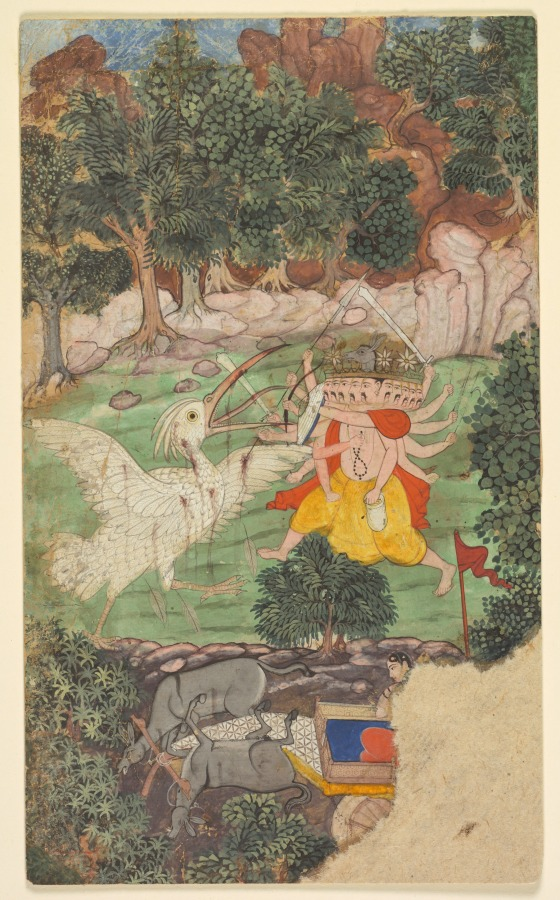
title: Battle of Ravana and Jatayu, from Chapters 50 and 51 of the Aranya Kanda (Book of the Forest) of Valmiki's Ramayana (Rama’s Journey); folio from the "Burnt" Ramayana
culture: Central India, Bundelkhand Region, Madhya Pradesh, Rajput Kingdom of Datia, Court of Raja Bir Singh Deo (reigned 1605–27)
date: c. 1605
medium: Gum tempera and ink on paper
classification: Painting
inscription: [[verso, text of Battle of Ravana and Jatayu: Sanskrit text in devanagari script]]: Now [an extraordinary fight ensued] there between the vulture [Jatayu] and the demon [Ravana], quite violent [as if] between two great, winged mountains. With sharp [arrows, broad-headed and made of iron] and spears too, [that immensely powerful demon] forcefully showered [the King of Vultures]. In the course of battle that vulture, Jatayu, Lord of Birds, [confronted] that mass of arrows [the weapons of Ravana], and then he, [that vulture], like a mountain shaken about [fell backward], and with his talons dragged him [Ravana] down, overcome by anger. And that immensely powerful Lord of Birds instantly made his [Ravana’s] limbs bloodied with his sharply taloned feet. Then, Ravana [in a rage] pierced the King of Vultures in battle with [three direct arrows], frightful and swift. And after, he took up his other dreaded arrows on reserve, [with their arrowheads straight]. Each one resembled Death’s staff, [crushing insolence in] enemies. That immensely powerful, mighty demon pierced the [the bird’s body] with [perfectly sharp], golden-feathered arrows . . . . Without even taking those arrows into account, that enraged bird launched himself at Ravana. [Flying upward and then rushing down], raising his wings overhead, he battered [Ravana] with those feathered limbs. [Then, that Lord of Birds, energy blazing, splintered] with his claws [Ravana’s] bow and arrows, adorned with gems and pearls. And that Lord of Birds [splintered] also those very arrows shot [by Ravana]. Then, that immensely powerful [Indra of Birds] [over and over again, pecked at Ravana’s divine crown] made of gold and glittering with every jewel, and [being full of rage, hurled] it through the sky. Like the sun’s halo, it glistened as it sank. [That bird] struck down the asses, with their golden chest armor and devilish [pishacha] faces, and yanking them about, [instantly deprived them of breath]. He [smashed] the fearsomely huge chariot, which flies upon a wish, ornamented from wheel to pole, [each part arrayed in gold] and jewels. Tearing the charioteer from the chariot, [that Lord of Birds], with talons [that seemed like elephant goads, quickly shred him], then tossed him away. Ravana, his bow broken, chariot done with, [his asses killed, his charioteer slain,] fell to the ground, holding Vaidehi [in the crook of his arm]. Seeing Ravana fallen to the ground, his chariot smashed, all the other creatures celebrated the King of Vultures, crying—“Well done, well done!” [And the gods and sages] were amazed when they saw [Ravana, the destroyer of pride among enemy armies,] who was never defeated [by the gods and demons] on the front lines, defeated now [by the best of birds]. Then the denizens of the heavens praised that best of birds—“O excellent one, you have accomplished a difficult task!” The venerable King of Birds, who was extolled, became resolute and once again endured battle.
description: The vulture Jatayu, Lord of the Birds, his beak agape, loses feathers and dark red blood in his desperate fight to save Sita from her kidnapper, the ten-headed Ravana. Since this painting was damaged by fire in India decades ago, Sita is barely visible now at the bottom right corner, in Ravana’s donkey-led chariot. Her expression is pensive, as she awaits her fate. In adherence to the Ramayana text written on the back of the painting, the donkeys were the first victims in the battle that will claim Jatayu’s life.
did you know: This page is from a series known as the “Burnt Ramayana,” since it was damaged by fire.